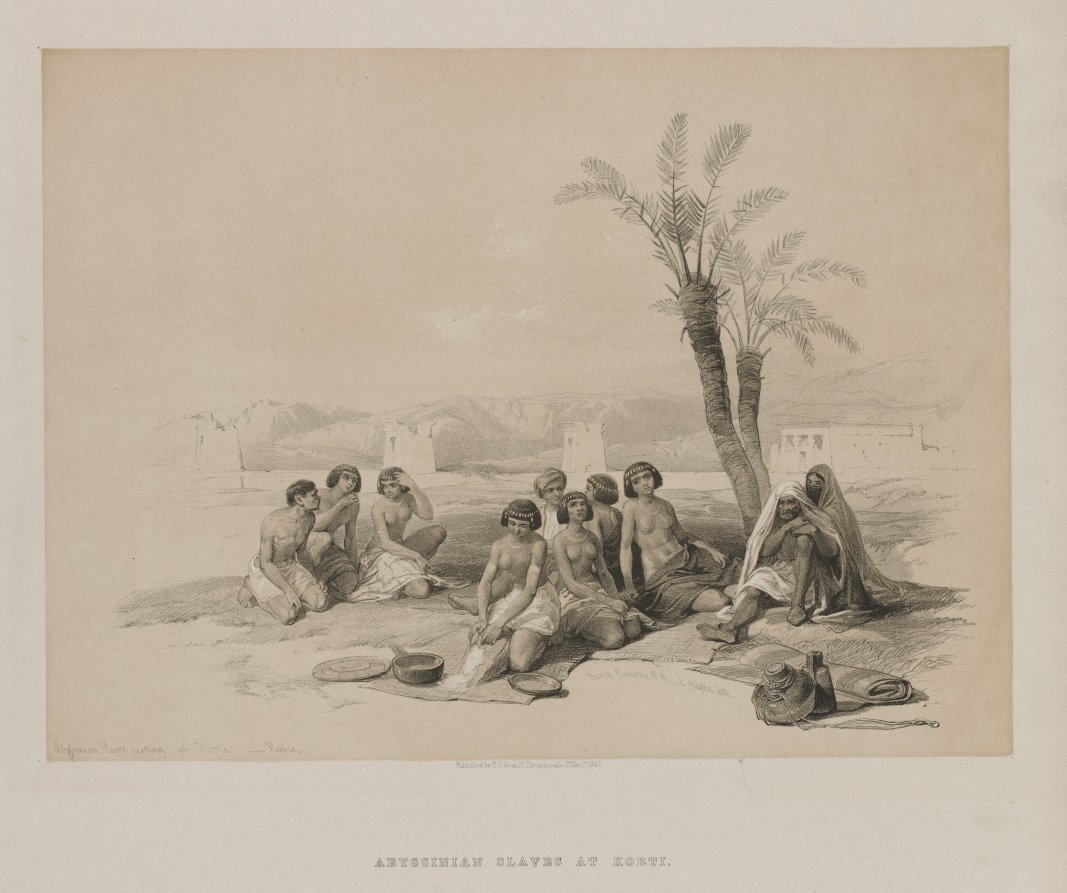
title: Egypt and Nubia, Volume I: Abyssinian Slaves Resting at Korti-Nubia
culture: England, 19th century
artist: Louis Haghe (British, 1806–1885)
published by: F. G. Moon, 20 Threadneedle Street, London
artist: after David Roberts (Scottish, 1796–1864)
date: 1847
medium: color lithograph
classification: Print